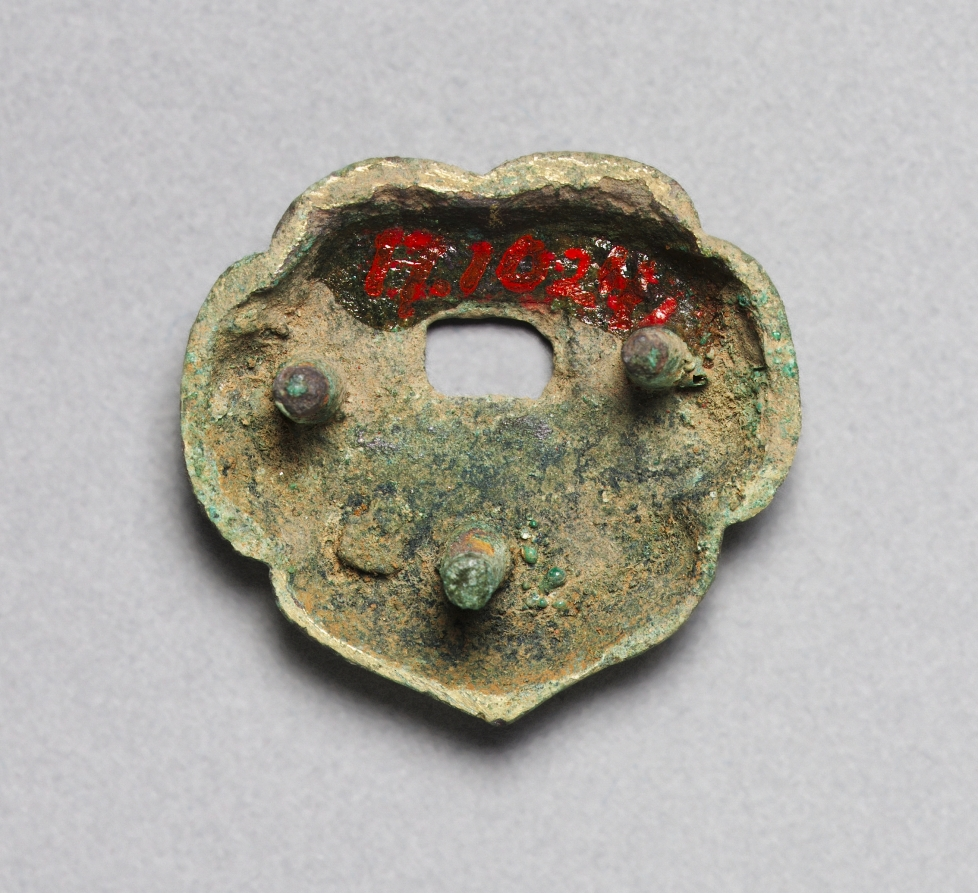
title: Nail Cover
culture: Korea, Goryeo dynasty (918–1392)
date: 918–1392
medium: bronze gilt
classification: Metalwork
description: Metallurgy advanced remarkably in the Goryeo period (918–1392), explaining why a large quantity of gilt-bronze artifacts were found in burial sites. This particular object was used to decorate a wooden coffin.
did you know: This particular object was used to decorate a wooden coffin.